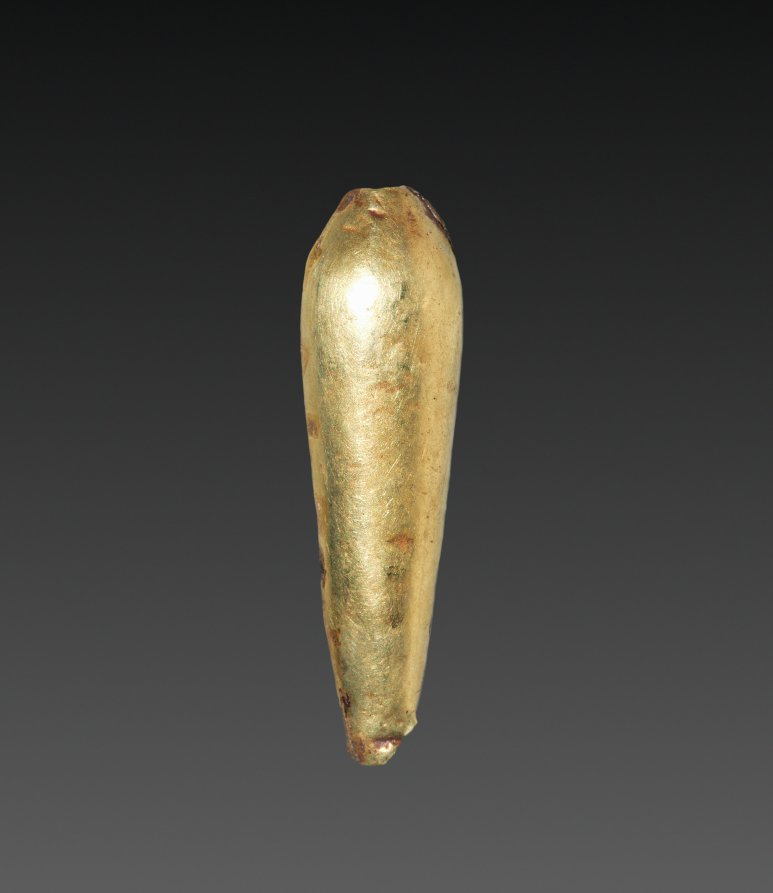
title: Teardrop-Shaped Bead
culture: Egypt, Middle Kingdom (2040–1648 BCE), Dynasty 12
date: 1980–1801 BCE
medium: gold over calcite gesso core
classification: Jewelry